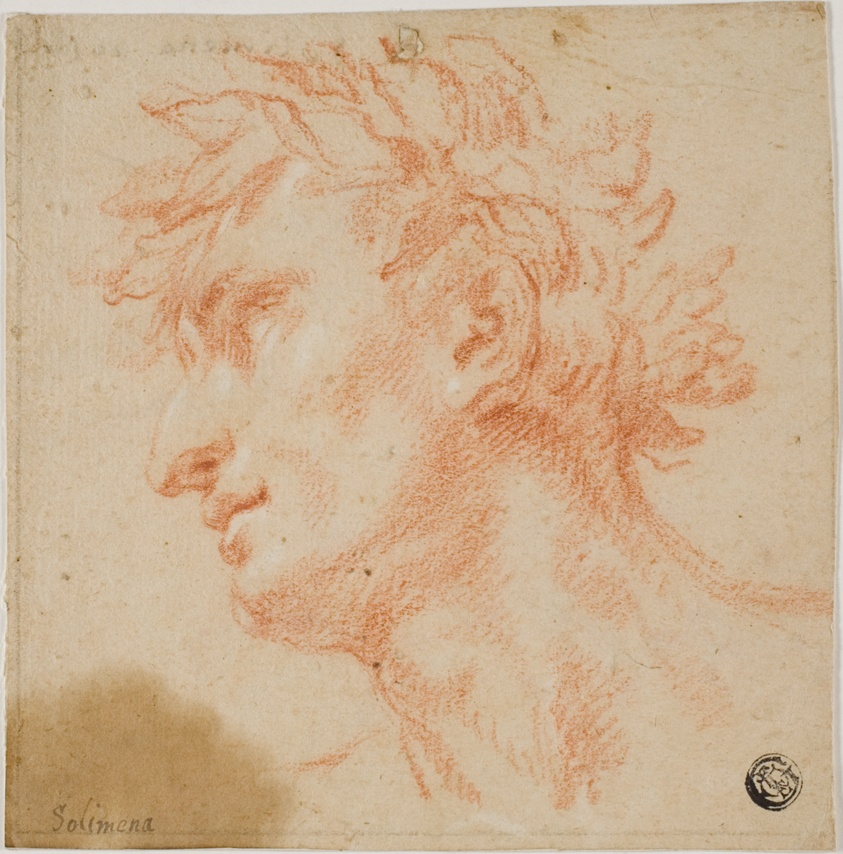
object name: Drawing and Watercolor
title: Profile of Male Head, Crowned with Laurel Leaves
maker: Attributed to Francesco Solimena (Italian, 1657-1747); or circle of Lieven Mehus (Flemish, 1630-1691)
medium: Red chalk heightened with touches of white chalk, on tan laid paper, laid down on cream laid paper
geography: Italy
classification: chalk; drawings (visual works); prints and drawing